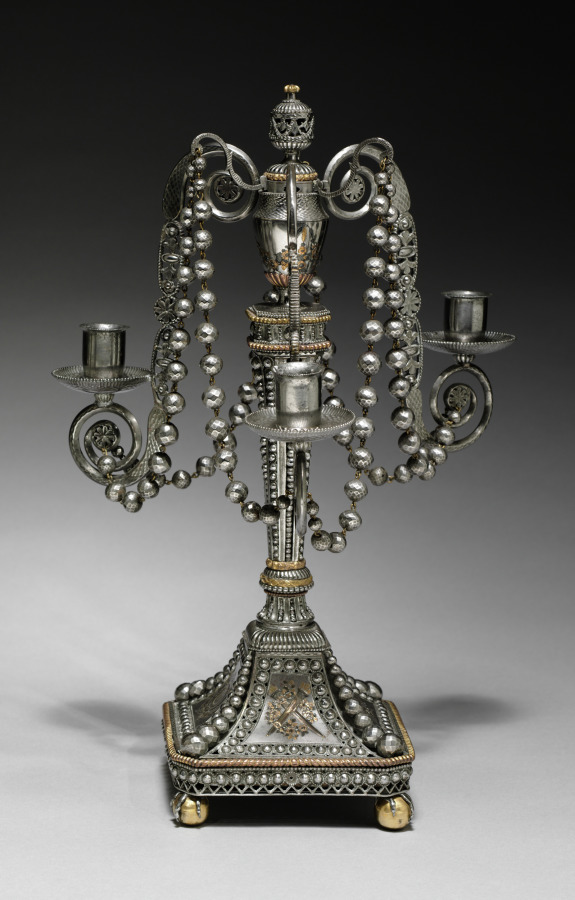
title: Candelabra (2 of 2)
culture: Russia, Tula, Neo-classical, 18th century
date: c. 1790–1795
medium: cut and polished steel with gold and silvered decoration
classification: Metalwork